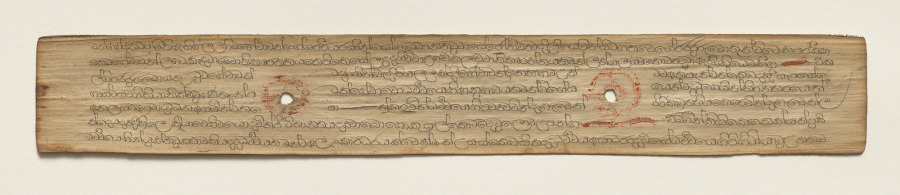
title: Leaf from a Buddhist Manuscript (verso)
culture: Sri Lanka, Singhalese, Late 17th century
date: c. 1700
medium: fiber paper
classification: Manuscript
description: Palm leaf material is still used for manuscripts in Sri Lanka. The palm leaves are prepared first by boiling them, drying them in the sun, and then rubbing them with oils. Scribes then use a metal stylus to incise the text. Then charcoal powder is wiped across the pages, filling in only the inscribed lines.